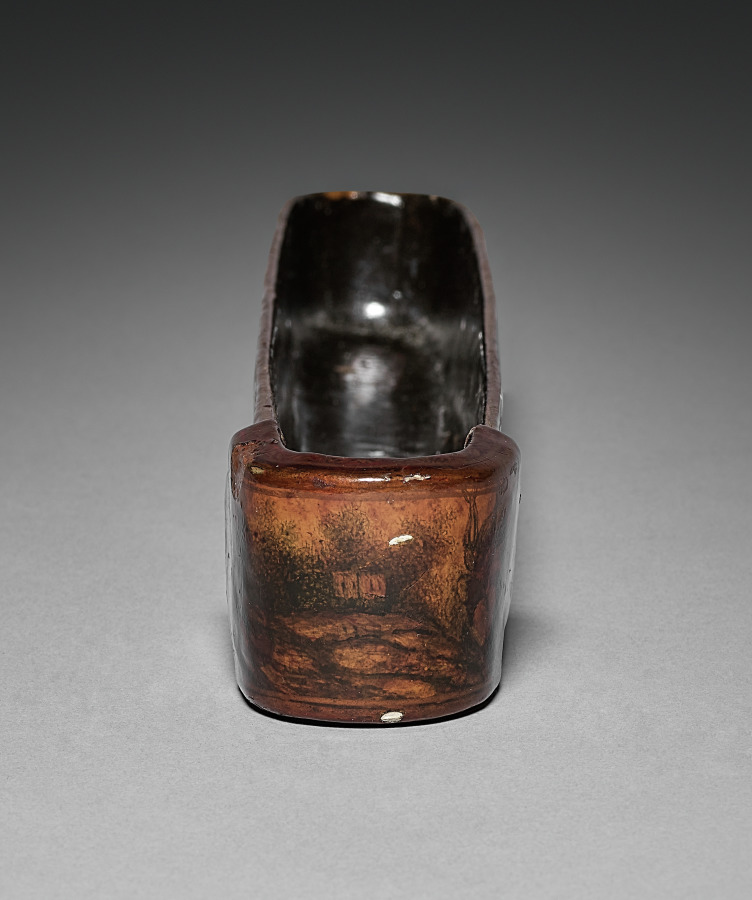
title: Pen and Ink Box (base)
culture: Iran, probably Isfahan, Safavid period (1501–1722)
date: 1667–98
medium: Varnished lacquer and opaque watercolor over papier-mâché, ink, and copper alloy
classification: Lacquer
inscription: 1109